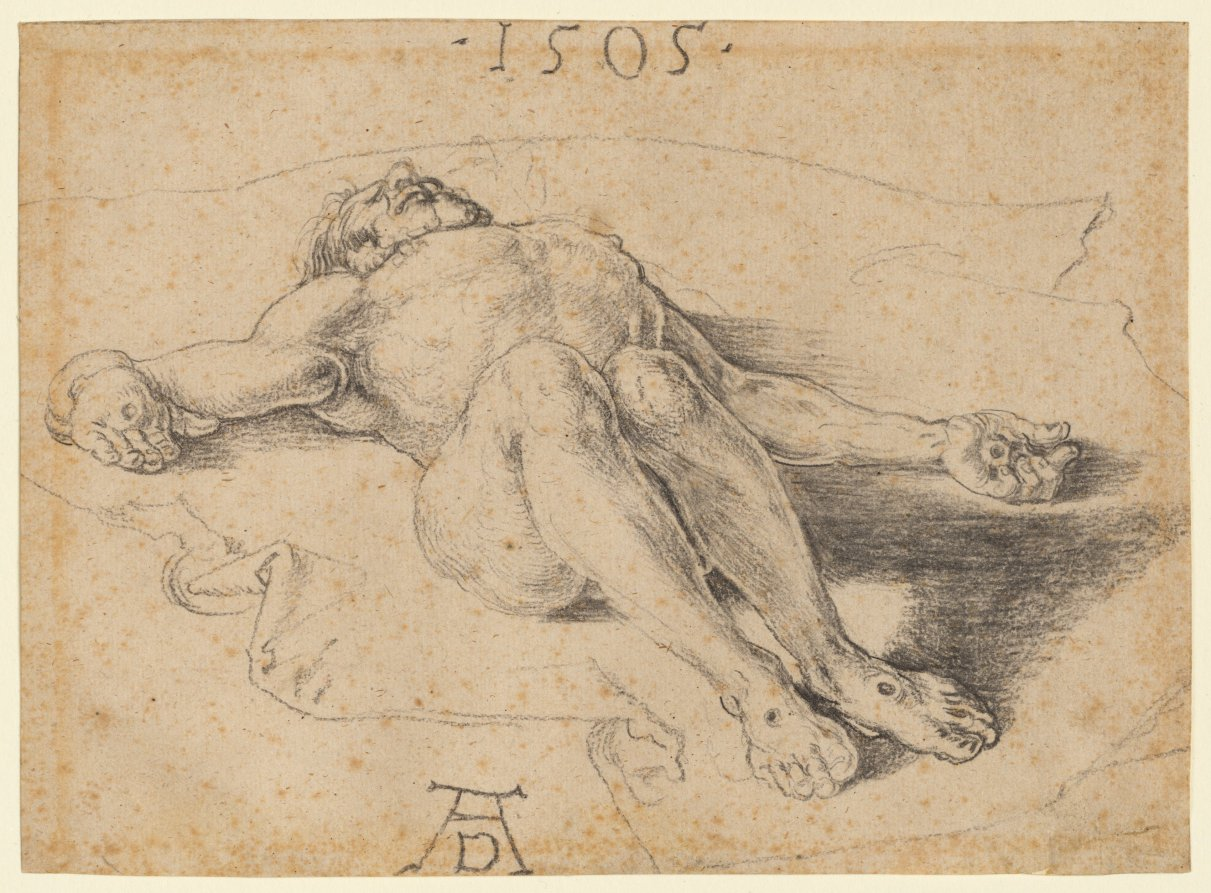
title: The Dead Christ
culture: Germany, early 16th Century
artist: Albrecht Dürer (German, 1471–1528)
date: 1505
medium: charcoal; framing line in graphite (top edge)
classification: Drawing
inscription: signed(?), lower center, in charcoal: [artist monogram: AD] ; by artist(?), upper center, in charcoal: .1505. VERSO, upper center, in graphite: X